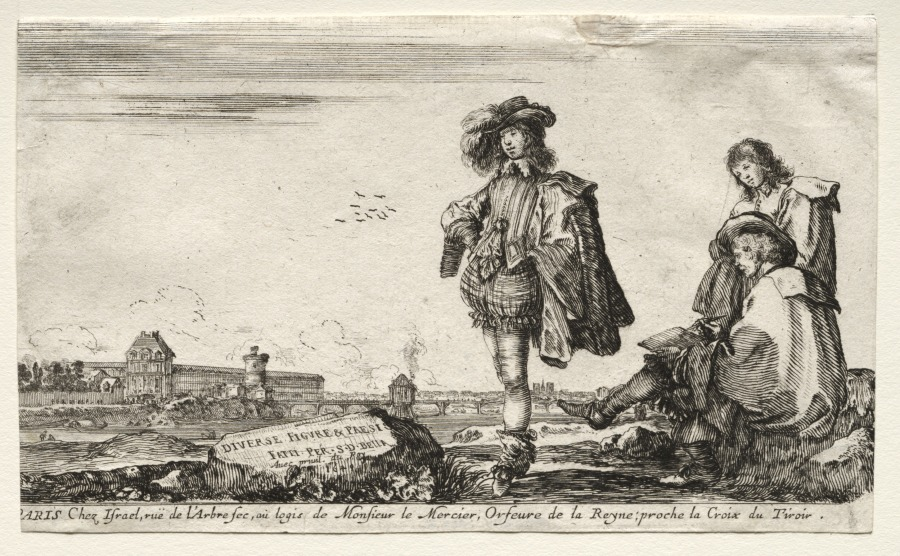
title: Various Figures and Landscapes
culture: Italy, 17th century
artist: Stefano Della Bella (Italian, 1610–1664)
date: 1649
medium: etching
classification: Print